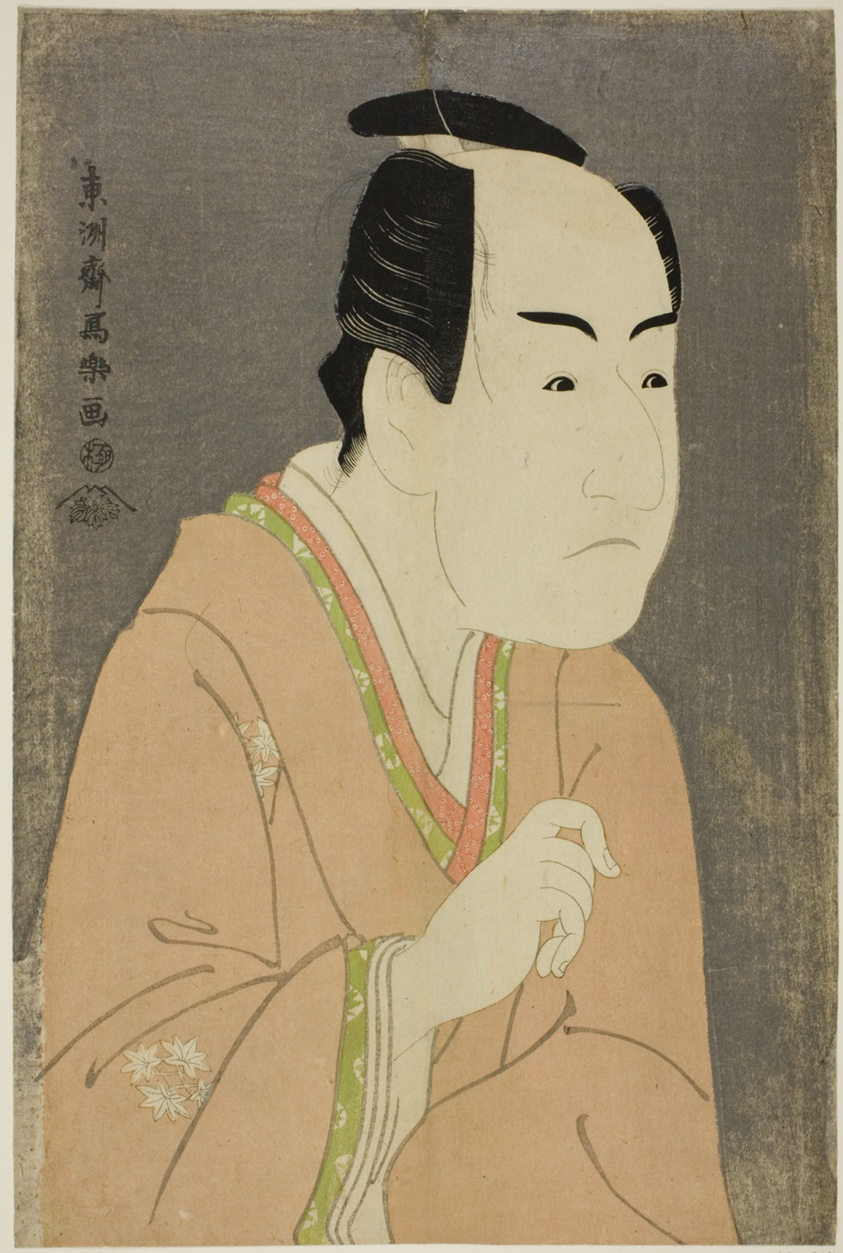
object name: Print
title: The actor Ichikawa Monnosuke II as Date no Yosaku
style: Japanese (culture or style)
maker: Toshusai Sharaku 東洲斎 写楽; Japanese, active 1794-95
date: 1794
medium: Color woodblock print; oban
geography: Japan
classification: woodblock print; print; asian art